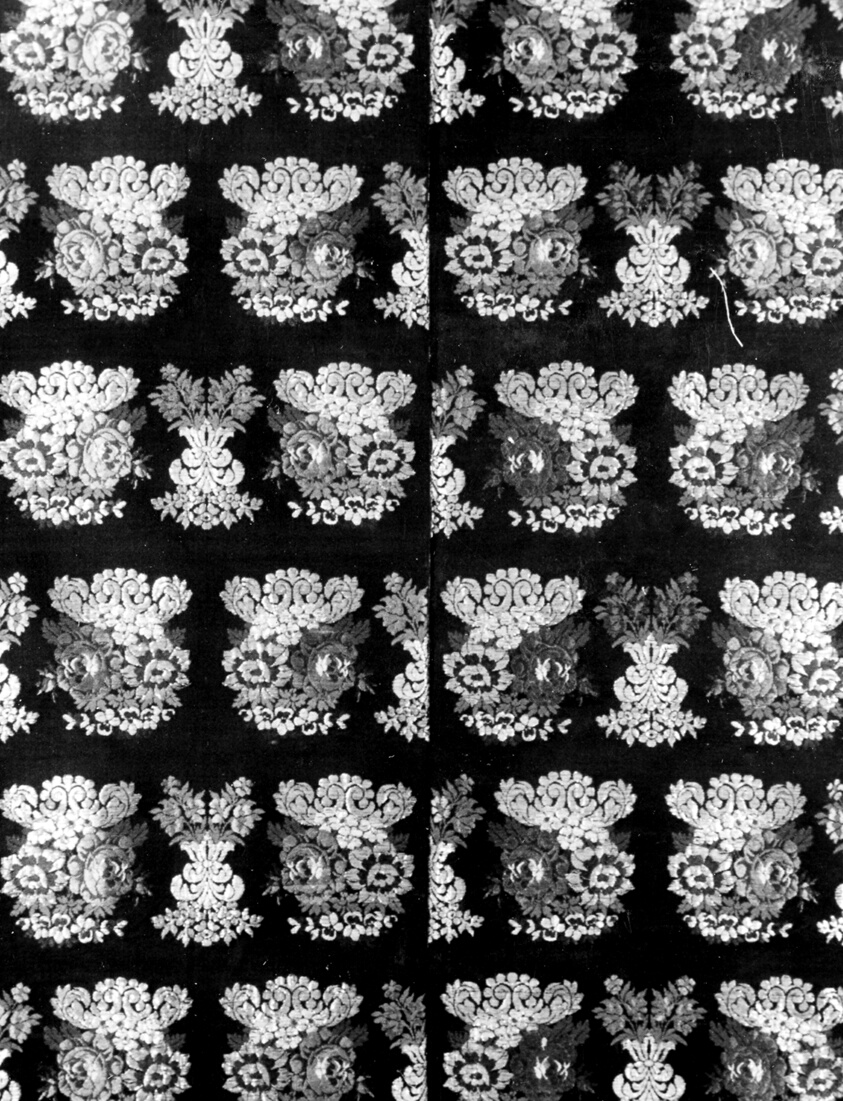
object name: Textile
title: Panel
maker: Russia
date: 1801/25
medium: Silk, cotton, and gilt- and silvered-metal-strip-wrapped cotton, warp-float faced 7:1 twill weave with supplementary brocading wefts; edged with silk, warp-float faced 7:1 satin weave; lined with cotton, plain weave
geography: Russia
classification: textile; weaving